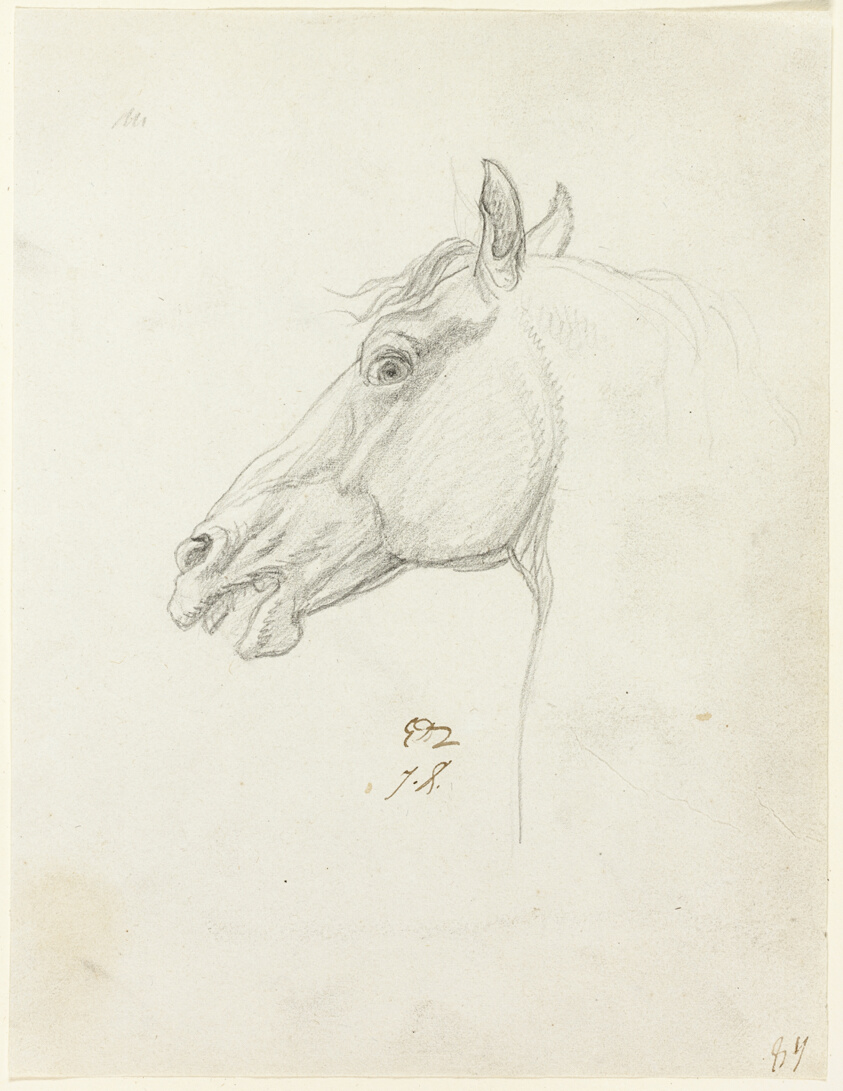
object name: Drawing and Watercolor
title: Horse's Head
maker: Jacques-Louis David; French, 1748-1825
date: c. 1810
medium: Graphite on ivory wove paper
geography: France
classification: graphite; drawings (visual works); prints and drawing